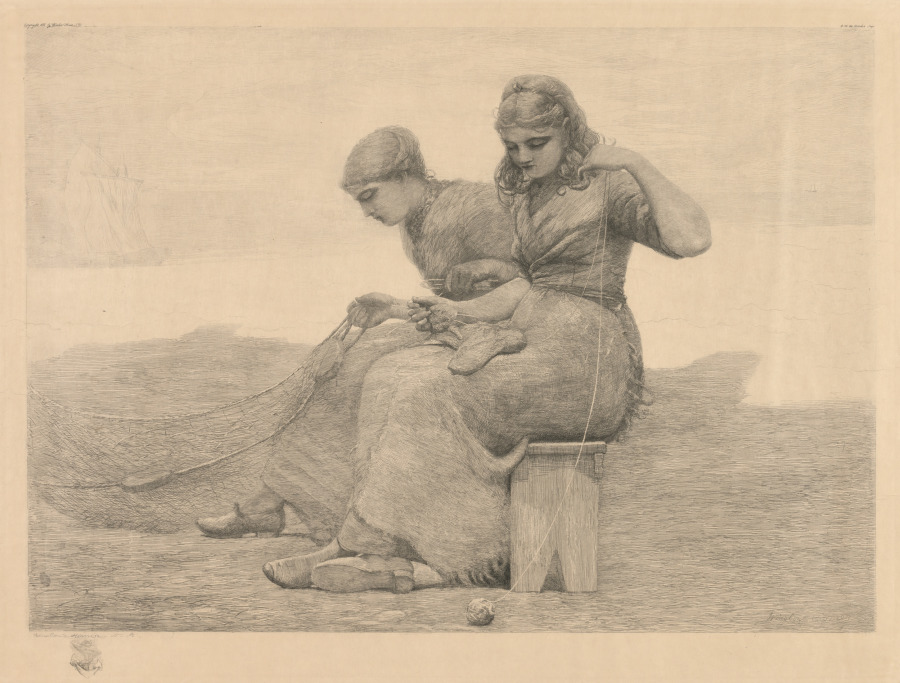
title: Mending the Nets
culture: America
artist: Winslow Homer (American, 1836–1910)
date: 1888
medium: etching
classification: Print